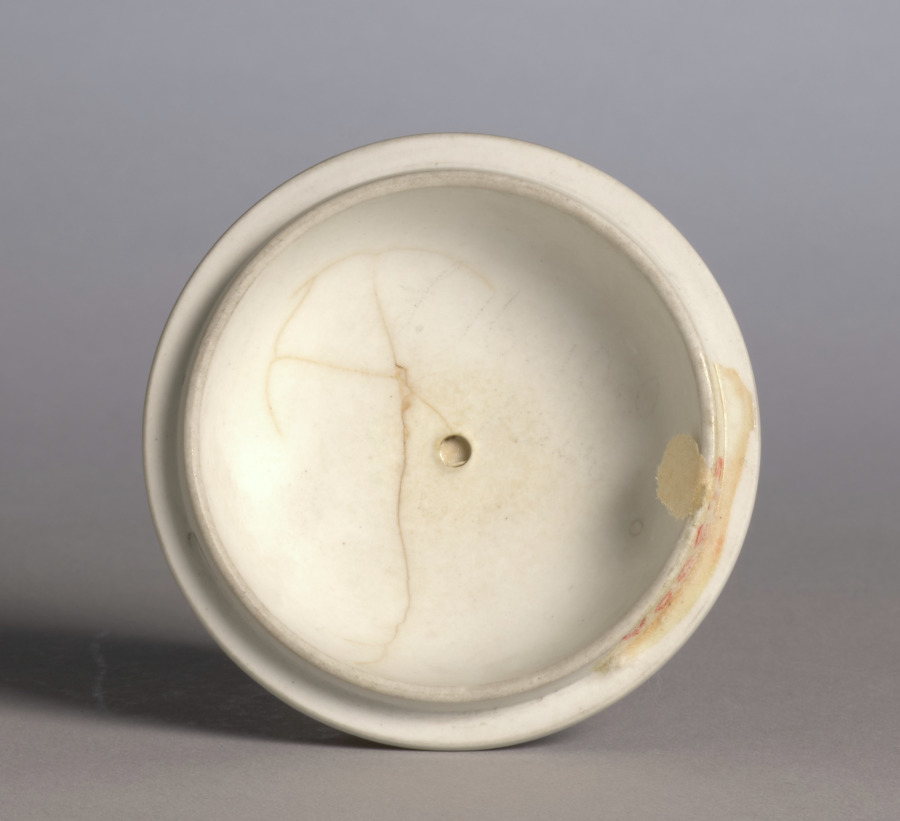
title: Cover for a Vase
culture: England, Staffordshire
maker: Josiah Wedgwood and Sons (British, Staffordshire, est. 1759)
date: c. 1850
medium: jasper ware with relief decoration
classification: Ceramic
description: Wedgwood's tricolor jasperware first became popular in the 1770s during a period of fascination with neoclassical decoration. This vase was probably made around 1850 during the period when this type of decoration was revived. The relief medallions depict two versions of the Greek god Apollo, the god of music, next to his harp or lyre.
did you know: See cover record.